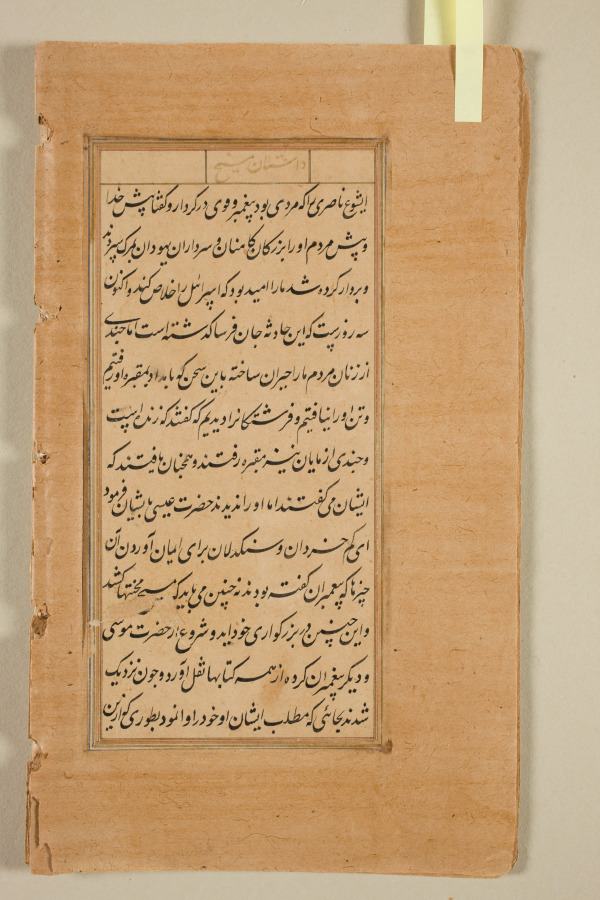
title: Text page from a Mirror of Holiness (Mir’at al-quds) of Father Jerome Xavier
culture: Mughal India, Allahabad, made for Prince Salim (1569–1627)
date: 1602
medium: Ink and gold on paper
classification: Manuscript